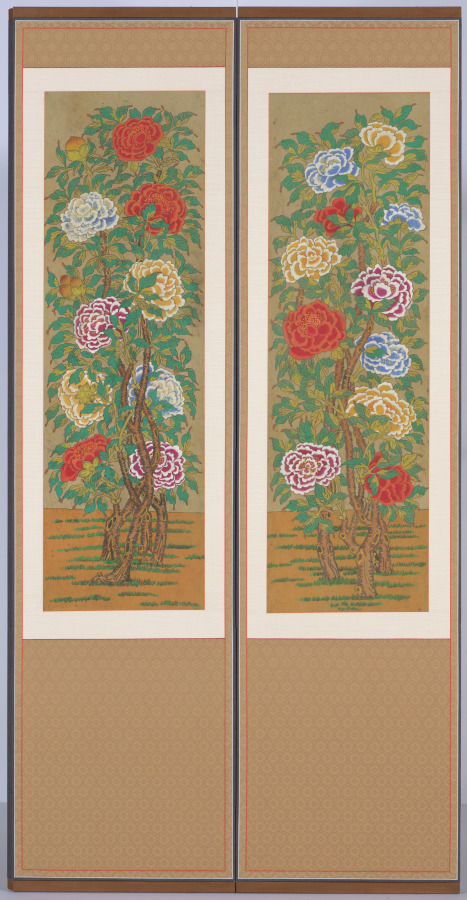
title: Peonies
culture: Korea, Joseon dynasty (1392−1910) or Japanese colonial period (1910−1945)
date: early 1900s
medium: Eight-panel folding screen; ink and color on silk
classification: Painting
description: By the late nineteenth century, peony paintings with bold designs and striking graphic stylization were increasingly produced and consumed by middle-class members because of its symbolic meaning: prosperity and wealth. This early 20th-century folding screen of peonies may have used for festive occasions such as weddings.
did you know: This early 20th-century folding screen has both sides painted with the image of bloomed peonies.